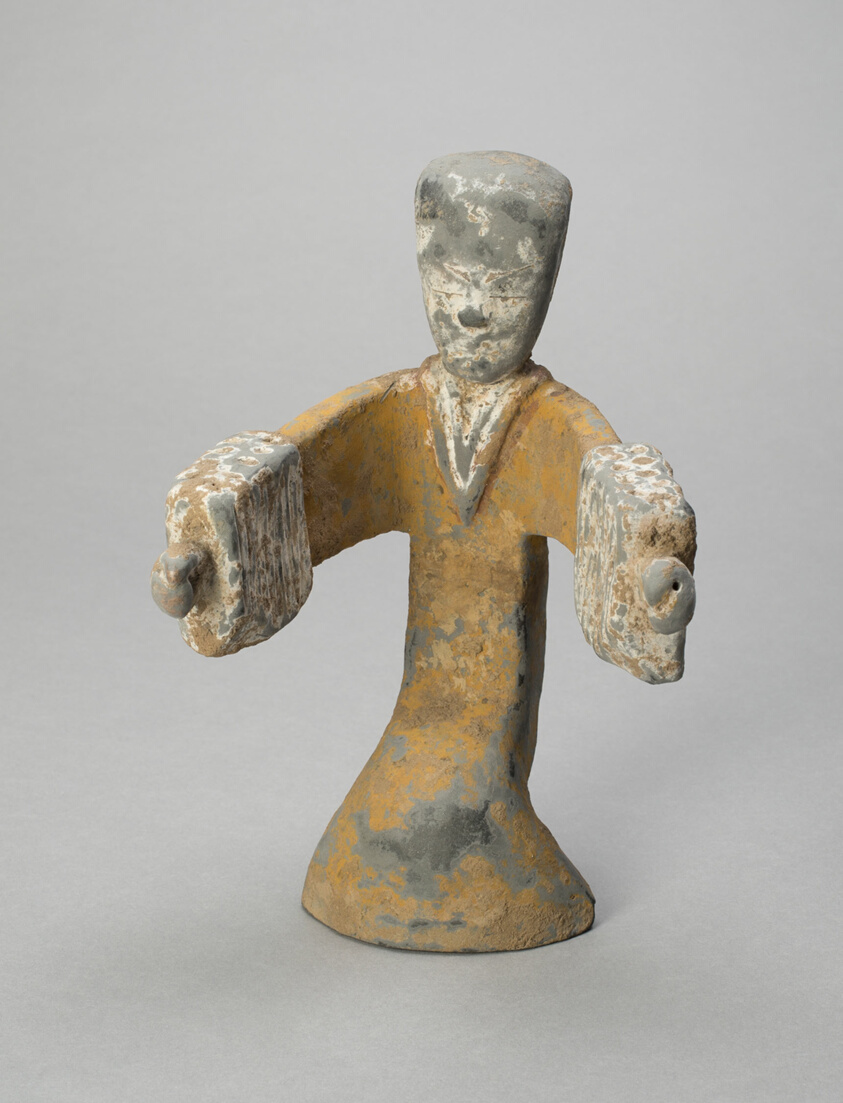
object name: Sculpture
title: Female Dancer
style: Chinese (culture or style)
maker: China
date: Western Han dynasty (206 BCE–9 CE), about 2nd century BCE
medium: Gray earthenware with slip coating and polychrome pigments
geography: China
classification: earthenware; ceramics; sculpture; asian art